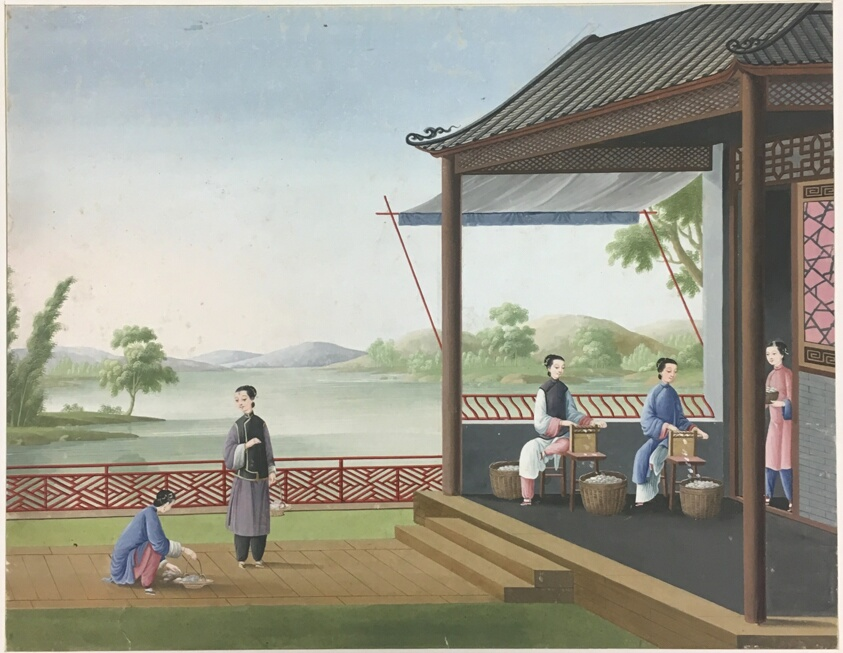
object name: Painting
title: Spinning Cloth, Preparing Tea Leaves, Preparing Silk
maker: China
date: Early 19th century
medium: Colors on paper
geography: China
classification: painting; asian art; print